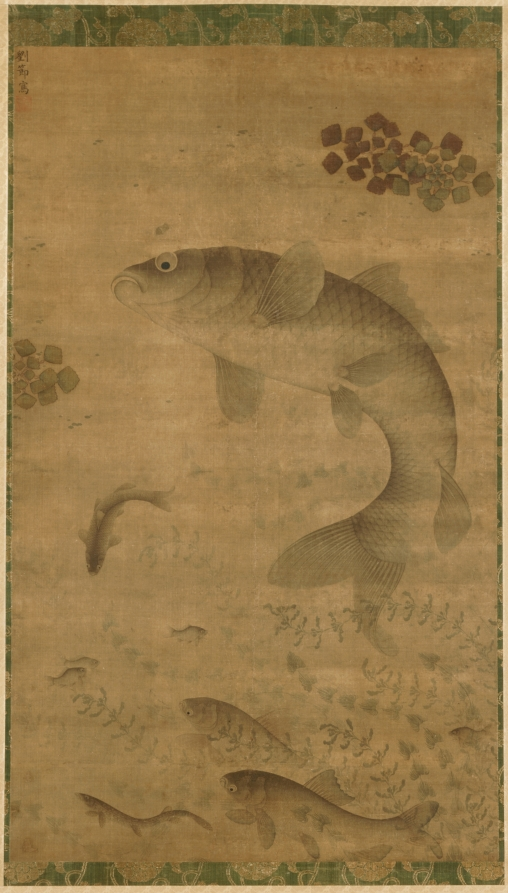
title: Leaping Carp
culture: China, Ming dynasty (1368–1644)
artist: Liu Jie (Chinese, c. 1447–1520s)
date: 1368–1644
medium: hanging scroll, ink and color on silk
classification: Painting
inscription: Artist's signature and seal: Written by Liu Jie 劉節寫. [seal] Chin-i-chih-hui chih chang.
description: With a fine ink line and graded wash, the life-like depiction of these swiftly moving carp is representative of the high quality of works by Liu Jie, a Ming dynasty court painter known for his fish paintings. The artist’s signature and seal are in the painting’s top left corner. The carp is an auspicious and popular subject in Chinese painting. Here, the leaping carp can be associated with “a carp jumping the dragon gate,” which according to mythology transforms into a dragon, emblematic of a scholar’s success in passing the civil service examinations. Another reading suggests that this carp is not leaping but guiding his offspring in worshipping heaven.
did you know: The clusters of geometric leaves painted with mineral pigments are likely water caltrap.